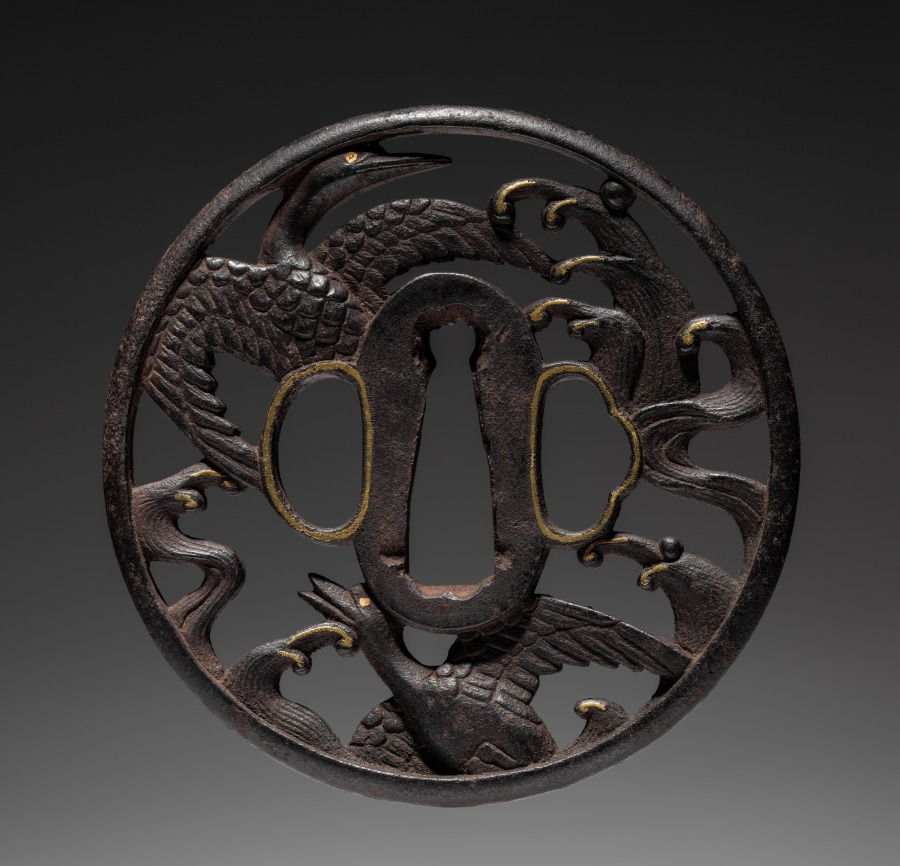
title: Sword Guard (Tsuba) with Geese and Waves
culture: Japan, possibly Edo period (1615-1868)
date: c. 1615–1868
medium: iron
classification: Arms and Armor